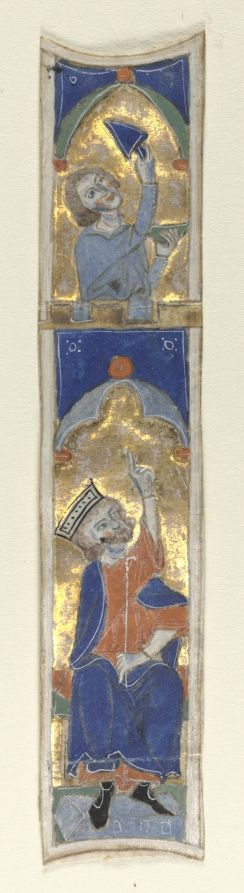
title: Historiated Initial (I) Excised from a Bible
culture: Italy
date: 1200s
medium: tempera and gold on parchment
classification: Manuscript